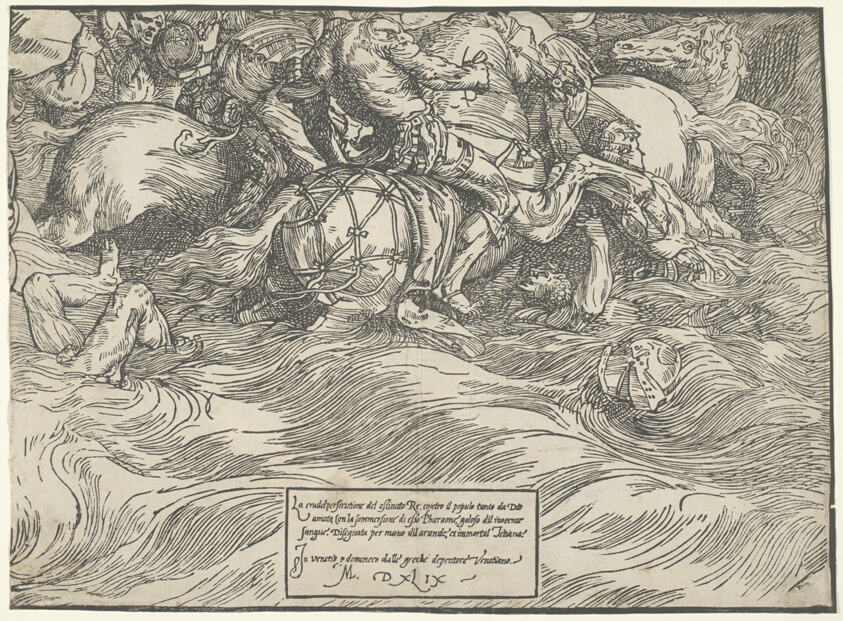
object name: Print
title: The Submersion of Pharaoh's Army in the Red Sea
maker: After Titian (Italian, c. 1488-1576); published by Domenico dalle Greche (Italian, active 1543-1558)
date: c. 1515, printed 1549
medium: Woodcut in black on ivory laid paper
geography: Italy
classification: woodcut; print; prints and drawing